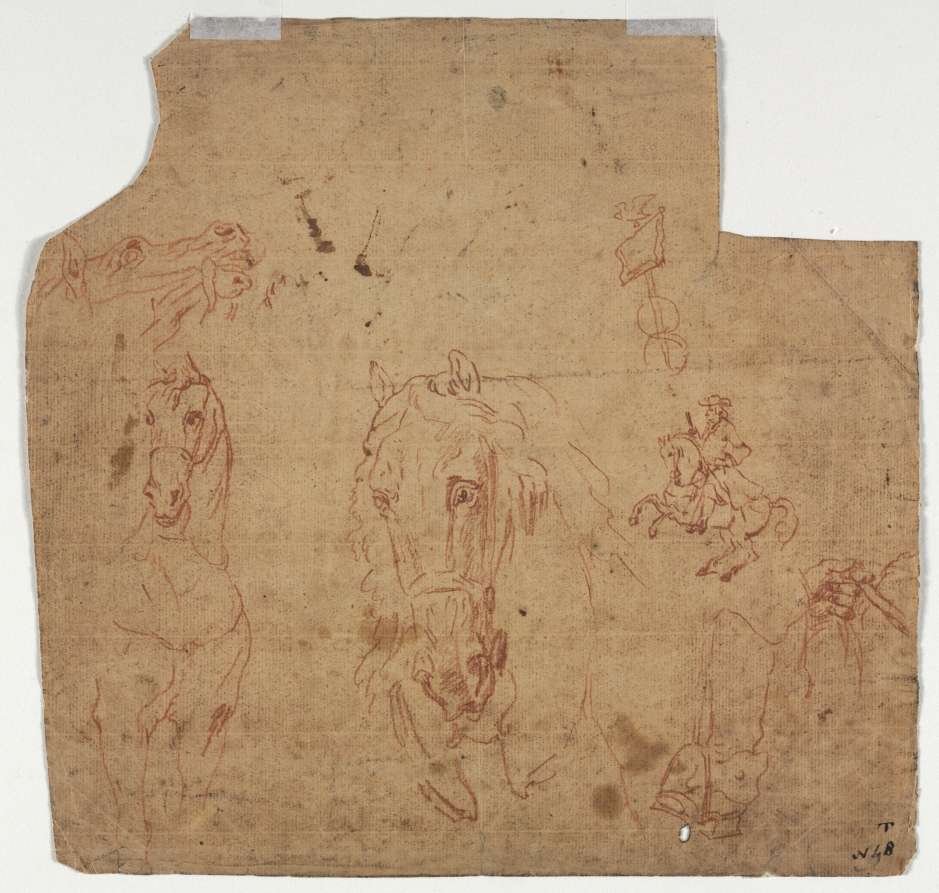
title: Sketches of Horses and Riders (recto)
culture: Flanders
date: 1600s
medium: red chalk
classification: Drawing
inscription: lower right, in graphite: 9 ; lower right, in brown ink: T / N48 [written over the "9"]